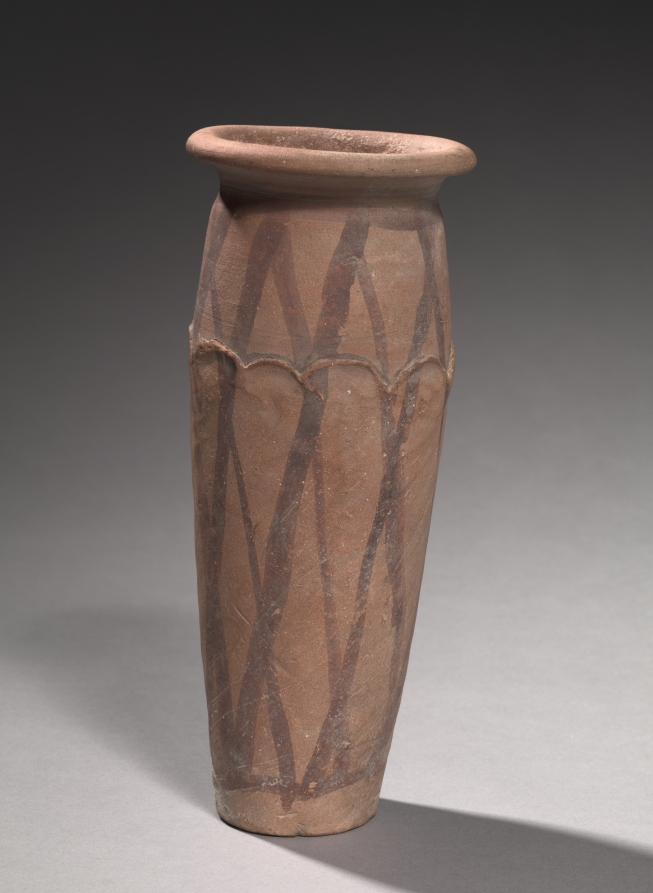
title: Wavy-Lined Jar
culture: Egypt, Predynastic (5000–2950 BCE), Naqada III (3200–3000 BCE)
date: 4000–3000 BCE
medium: marl clay pottery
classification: Vessels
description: Tall slender jars decorated with a wavy line in relief occur toward the end of the Predynastic Period. The netlike motif imitates the kind of rope sling or cradle that was used to carry this type of jar without handles.